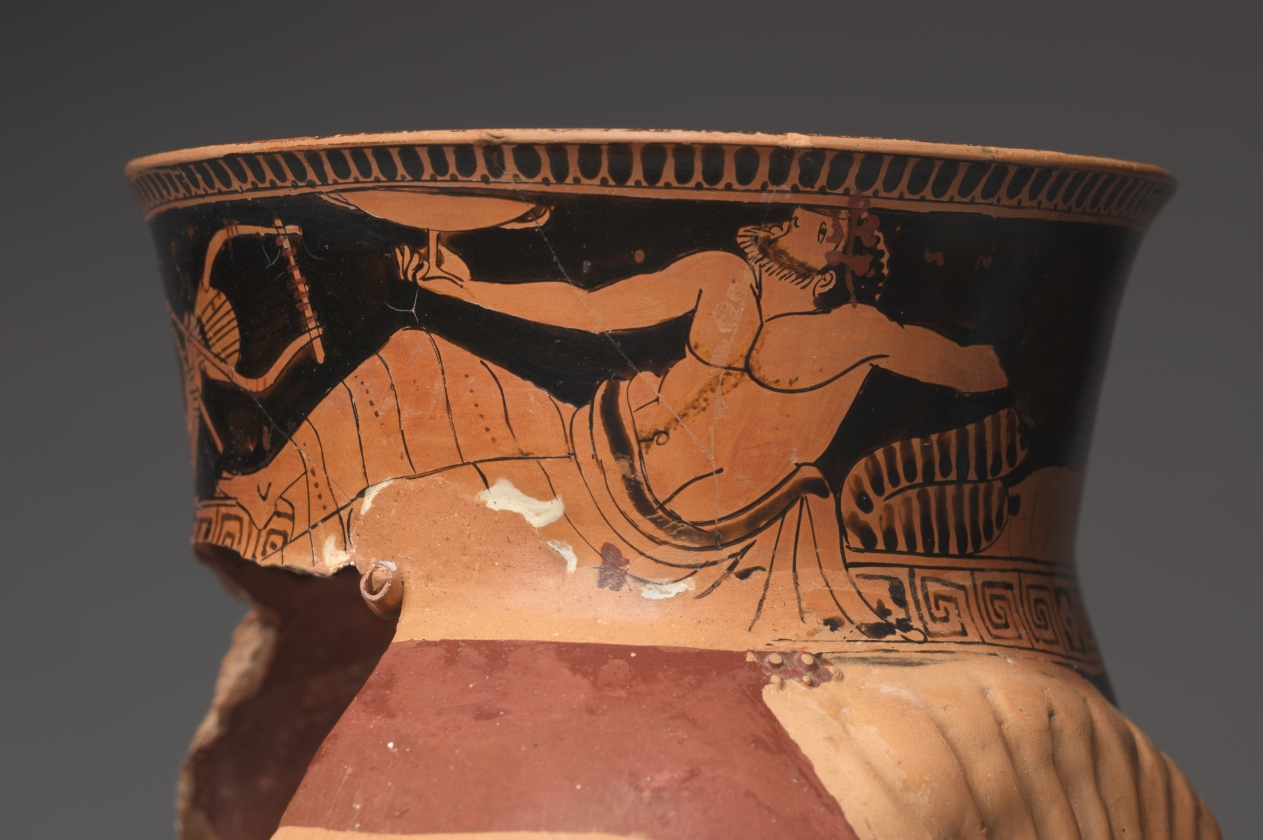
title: Red-Figure Ram-Head Rhyton (Drinking Vessel): Symposiasts; Satyr and Maenad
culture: Greek, Attic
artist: attributed to Brygos Painter (Greek, Attic, active c. 490–470 BCE)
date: c. 480–470 BCE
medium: ceramic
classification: Ceramic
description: Although now missing nearly half of its mold-made ram’s head, this rhyton, a kind of drinking horn, retains most of its painted red-figure sections. On the wheel-made bowl above, three symposiasts recline at a drinking party: a youth wearing a kidaris (flapped Scythian hat) and two bearded men holding drinking cups. The youth plays the pipes, while a lyre hangs nearby and one man throws his head back in song. The letters around them, which do not spell out known words, may allude to the music in the air. Flanking the handle are a pipe-playing satyr and a dancing maenad (only partially preserved).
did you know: This vessel once had a foot, but only a bit of its stem remains.